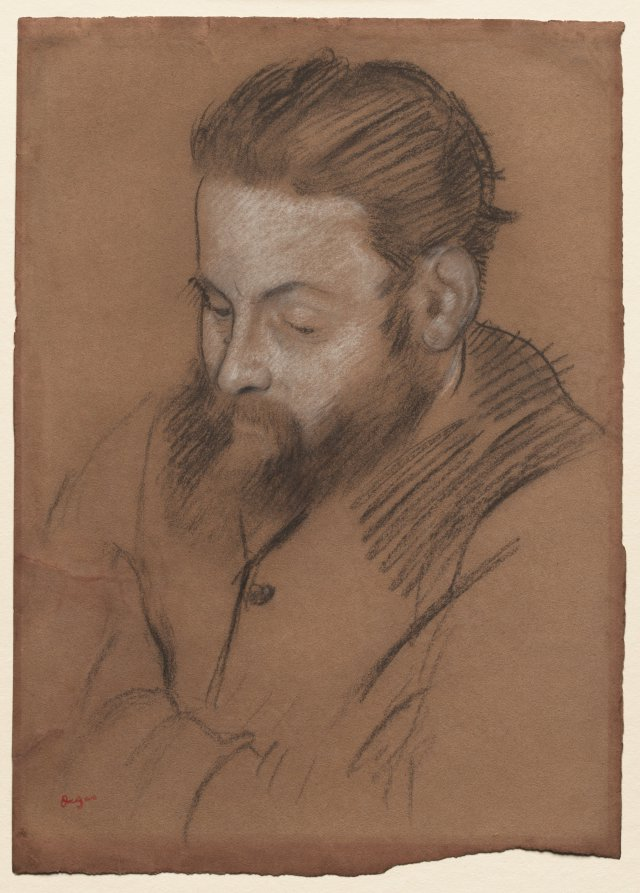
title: Diego Martelli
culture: France, 19th century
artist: Edgar Degas (French, 1834–1917)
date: 1879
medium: charcoal and white chalk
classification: Drawing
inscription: stamped in red, at lower left: Degas estate stamp (Lugt 658)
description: This sheet is one of many studies that Degas made in 1879 of his friend and supporter, the Italian art critic and patron Diego Martelli (1839-1896). Martelli was one of the most important champions of progressive modern art in Italy, and his writings on the 1879 Impressionist show became famous, playing a crucial role in publicizing the movement. This sheet relates to two painted portraits of the critic, one in the National Gallery of Scotland, Edinburgh, and the other in the National Museum of Fine Arts, Buenos Aires.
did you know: The ghostly white tone of Diego Martelli's face was likely pink or peach when Degas made the work, and has gradually faded over time.